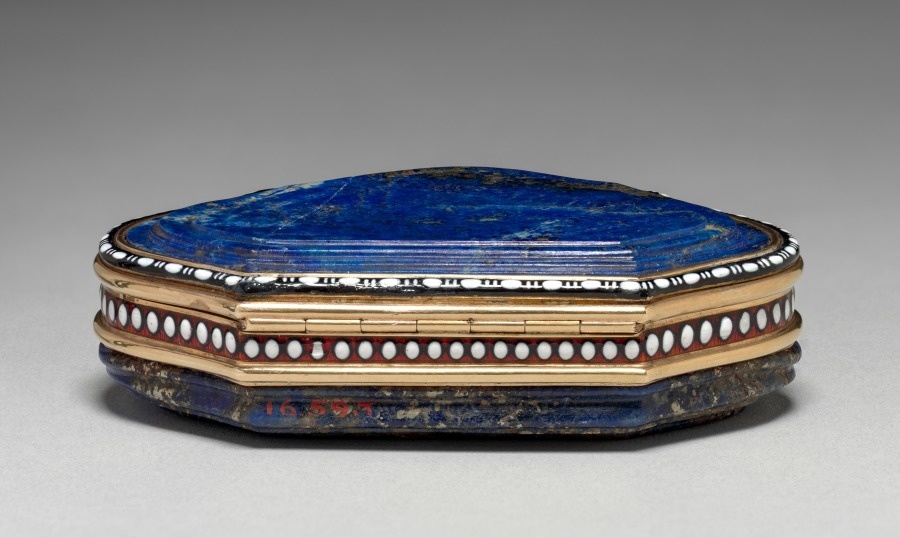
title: Snuff Box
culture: Germany, Dresden (?), mid-18th century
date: mid-1700s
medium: lapis lazuli with enameled gold mounts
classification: Miscellaneous